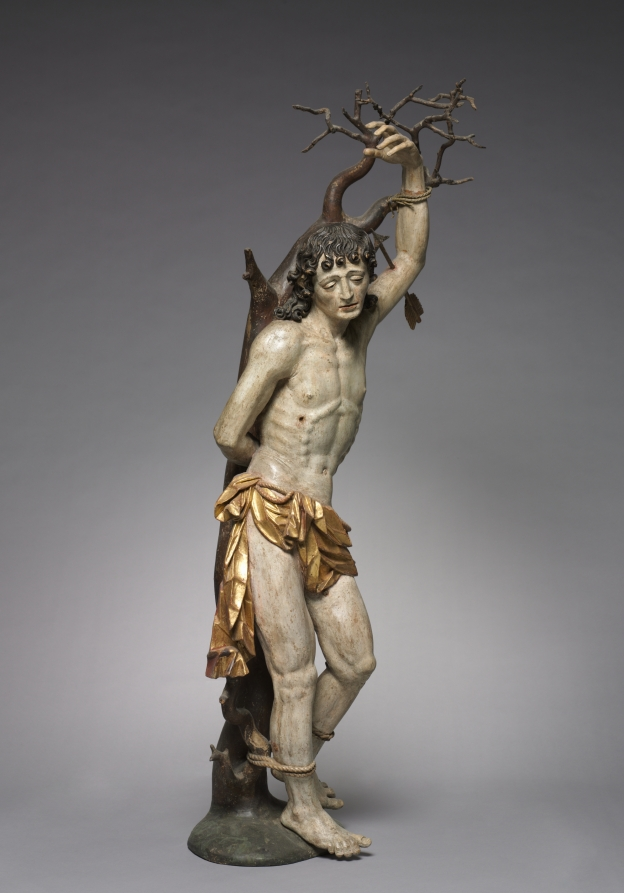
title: Saint Sebastian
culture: Germany, early 17th century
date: c. 1600–1620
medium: painted and gilded wood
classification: Sculpture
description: An early Christian saint and martyr, Sebastian was condemned to death by the Roman emperor Diocletian. Bound to a tree and shot with arrows, he survived—only later to be martyred by beating. This figure embodies the blend of stylistic influences that characterized German sculpture in the early 1600s. The graceful pose and anatomical naturalism of the legs indicate the influence of Italian Mannerism, while the crisp, stylized patterns of Sebastian’s hair and loincloth recall German Gothic works from the 1400s. The tree to which Sebastian is bound is an actual branch, shaped and refined to its present appearance.